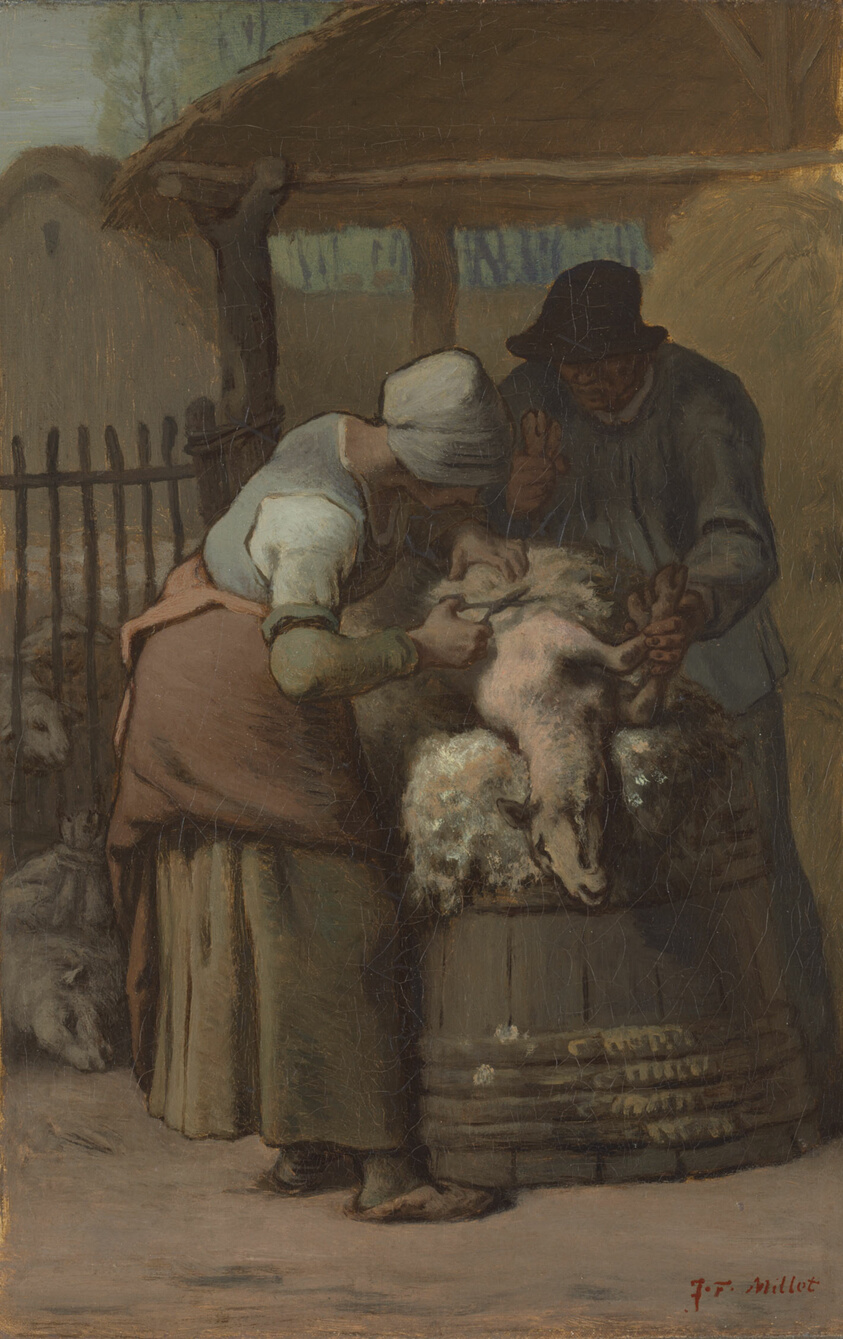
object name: Painting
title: The Sheepshearers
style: Barbizon School, nineteenth century, 19th century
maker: Jean-François Millet (French, 1814–1875)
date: c. 1857–61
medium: Oil on canvas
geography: France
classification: painting; paint; oil paintings (visual works); oil on canvas; french; european painting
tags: rural life, sheep, man, woman, labor, animals, fences, farm, building, barns, scissors, Century of Progress, world's fairs, Chicago World's Fairs